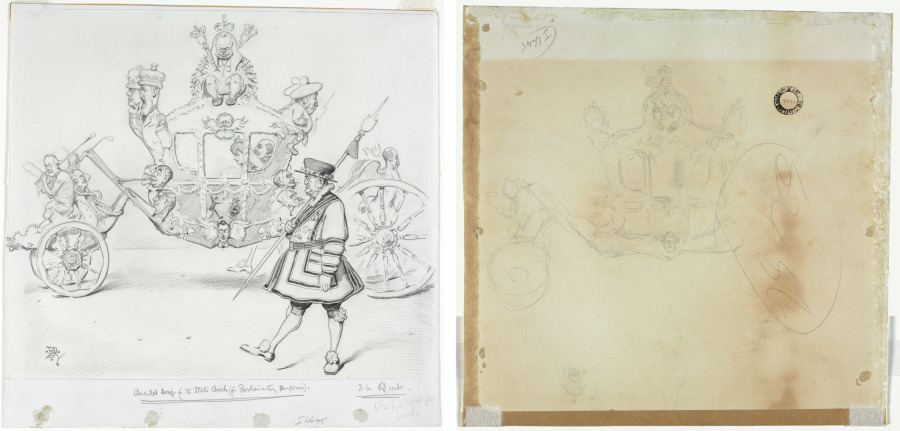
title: The Stagecoach for Parliamentary Purposes (recto) Study for Cab and Front Left Wheel of Coach and Study for Head of Crowned Figure Seated on Top of Coach (verso)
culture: England, late 19th-early 20th century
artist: Edward Tennyson Reed (British, 1860–1933)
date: c. 1889–1933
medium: graphite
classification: Drawing